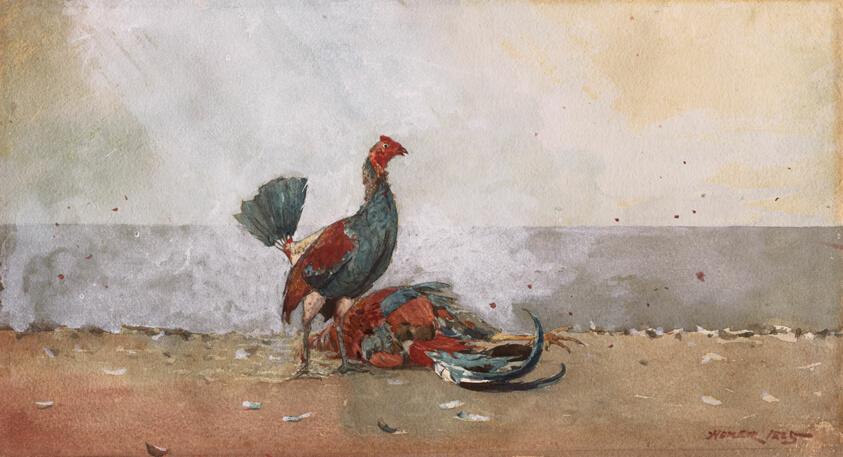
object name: Drawing and Watercolor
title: The Cock Fight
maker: Winslow Homer (American, 1836-1910)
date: 1885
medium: Transparent and opaque watercolor, with traces of scraping, over graphite, on thick, moderately textured, cream wove paper (top and lower edges trimmed)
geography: United States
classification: watercolor; drawings (visual works); prints and drawing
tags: animals